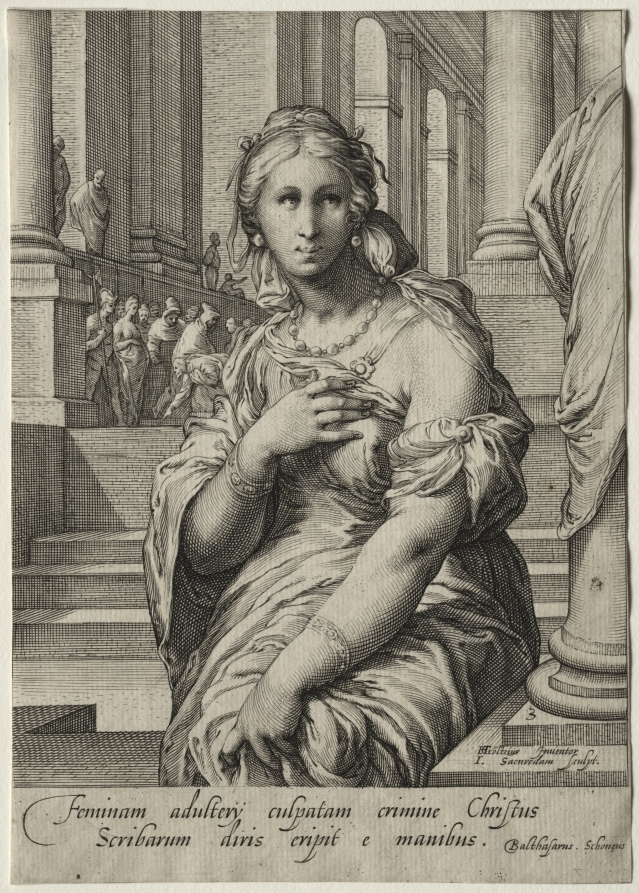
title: Heroines of the New Testament: The Woman Taken in Adultery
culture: Netherlands, 16th century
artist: Jan Saenredam (Dutch, 1565–1607)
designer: after Hendrick Goltzius (Dutch, 1558–1617)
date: c. 1595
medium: engraving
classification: Print